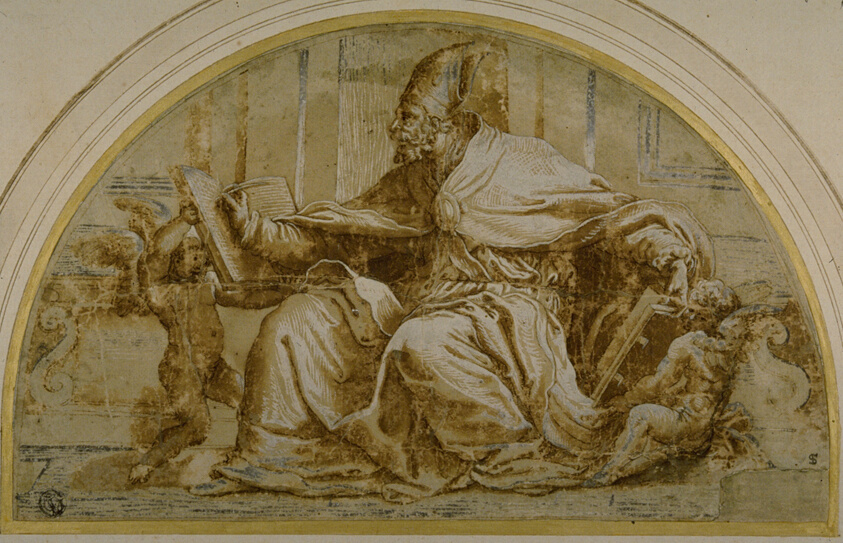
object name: Drawing and Watercolor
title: Seated Church Father (Saint Augustine?) with Putti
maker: After Pietro Buonaccorsi, called Perino del Vaga; Italian, 1501-1547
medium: Pen and brown ink, with brush and brown wash, heightened with lead white, on buff laid paper, laid down on cream laid card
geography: Italy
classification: ink with wash; drawings (visual works); prints and drawing